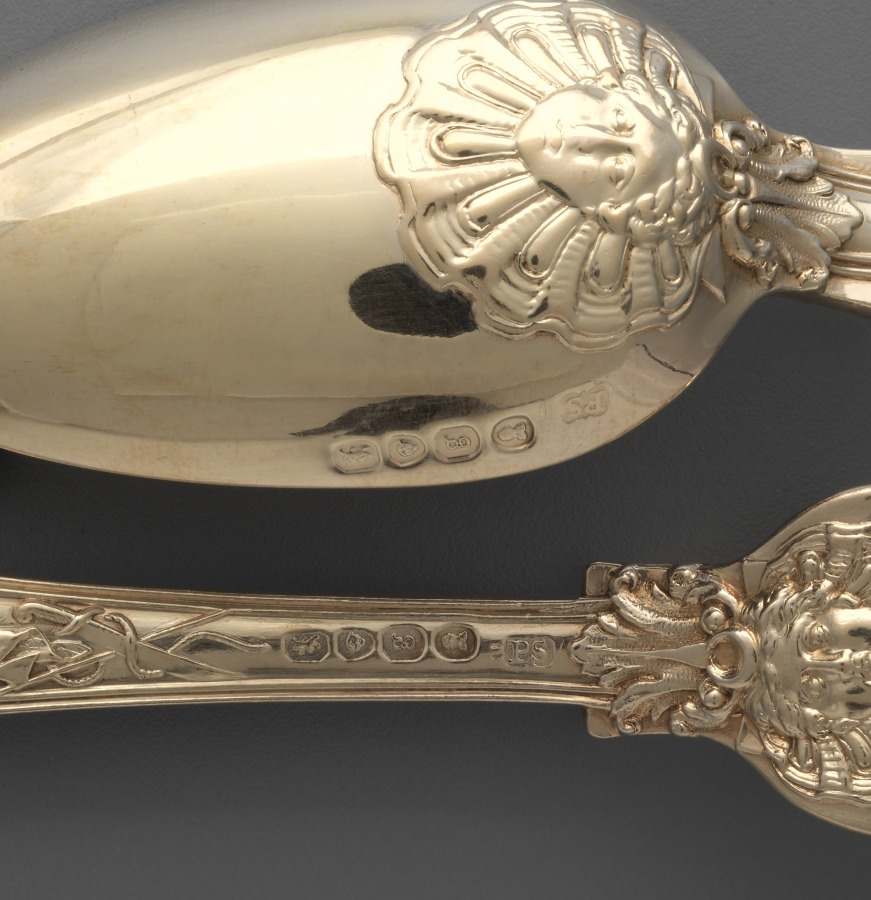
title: Dessert Fork and Spoon with Hunt Scenes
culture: England, London, 19th century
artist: Paul Storr (British, 1771–1844)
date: c. 1822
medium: gilt silver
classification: Silver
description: Paul Storr was perhaps the most famous and successful English silversmith working in the early 19th century. This fork and spoon were originally part of a larger set. The exceptionally high quality of the metalworking and gilding of these pieces is typical of Storr's work.